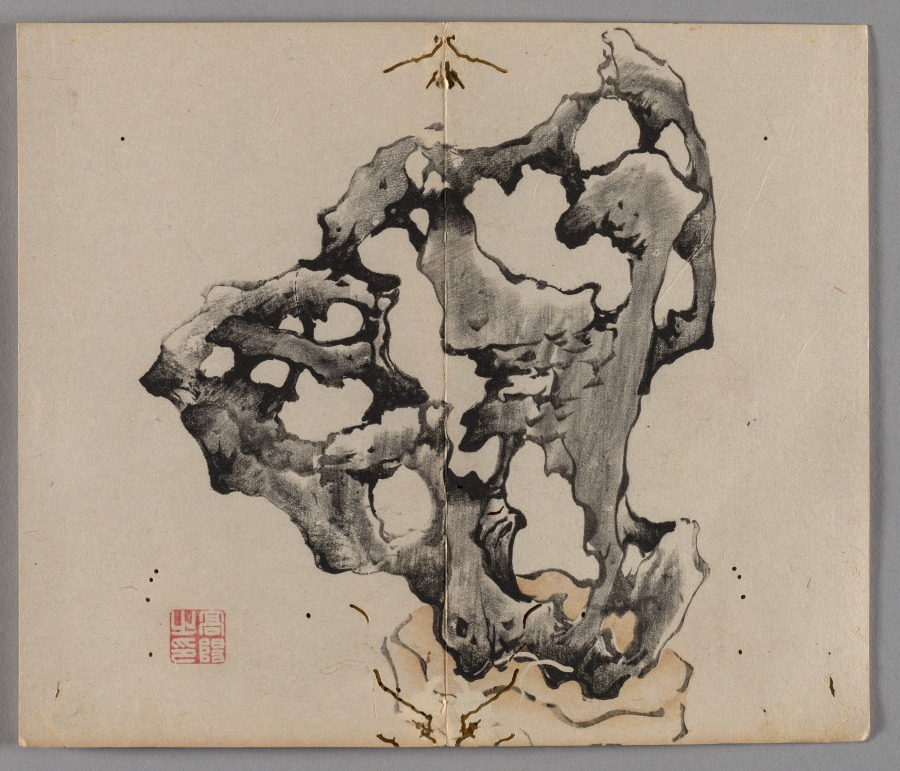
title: Ten Bamboo Studio Painting and Calligraphy Handbook (Shizhuzhai shuhua pu): Rocks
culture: China, Qing dynasty (1644-1911)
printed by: Hu Zhengyan (Chinese, c. 1584–1674)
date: 1633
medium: Woodblock-printed book; ink and colors on paper; first edition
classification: Print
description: Color printing reached a level of perfection in the early 1600s, as seen in this Ten Bamboo Studio Collection of Calligraphy and Painting and the Mustard Seed Garden Manual of Painting (printed 1679 and 1701). The painterly quality, precision in registering (aligning) the woodblocks, and harmonious colors made them the most successful color print editions in Chinese history. Both editions were printed and compiled in Nanjing, spread nationwide, and had a great impact on the arts in Japan and Korea.